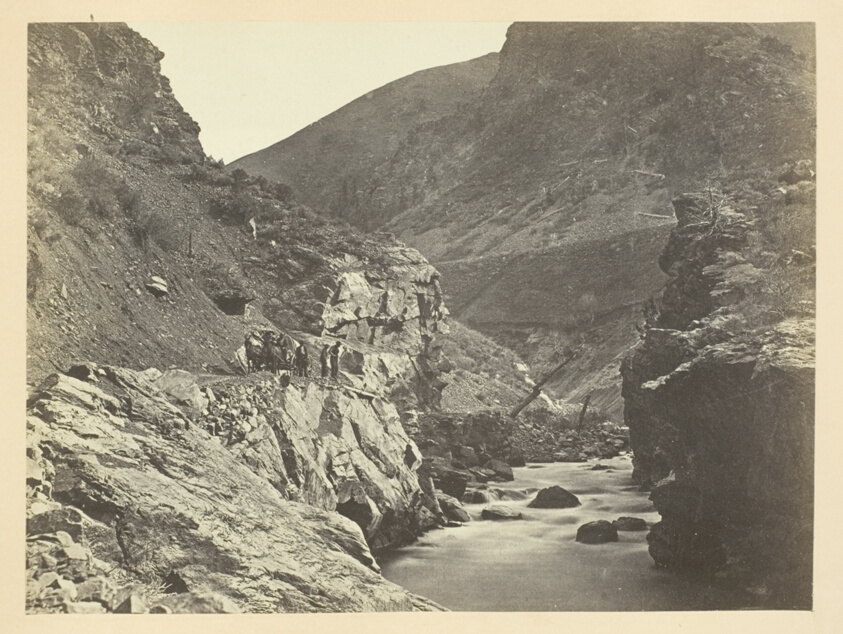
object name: Photograph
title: Devil's Gate, (From Below) Weber Canon, Wasatch Mountain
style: 19th century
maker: Andrew J. Russell; American, 1830–1902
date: 1868/69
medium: Albumen print, pl. XXII from the album "Sun Pictures of Rocky Mountain Scenery" (1870)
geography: United States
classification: photograph; albumen silver print; photography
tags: Collected by Hugh Edwards